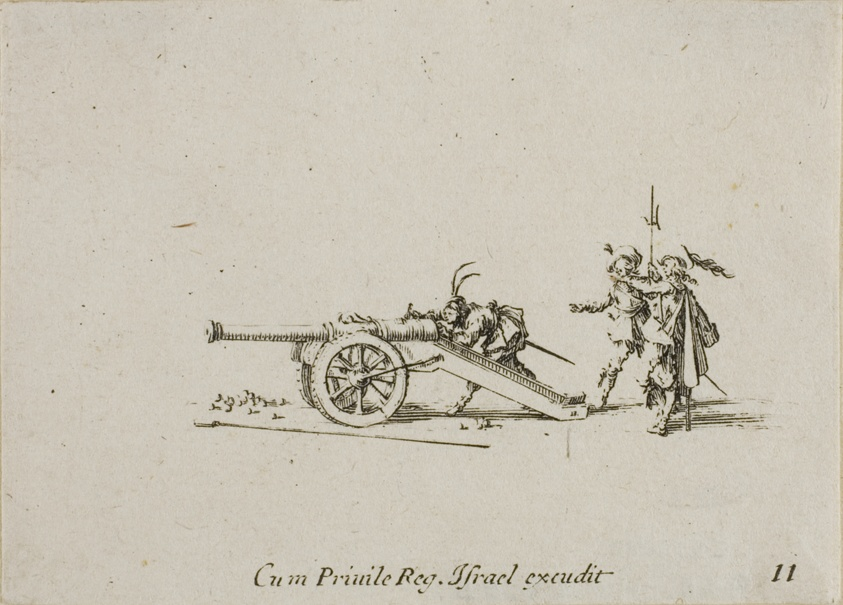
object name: Print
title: Loading the Canon, plate eleven from The Military Exercises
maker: Jacques Callot (French, 1592-1635); published by Israël Henriet (French, 1590-1661)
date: published 1635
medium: Etching on paper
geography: France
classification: etching; print; prints and drawing